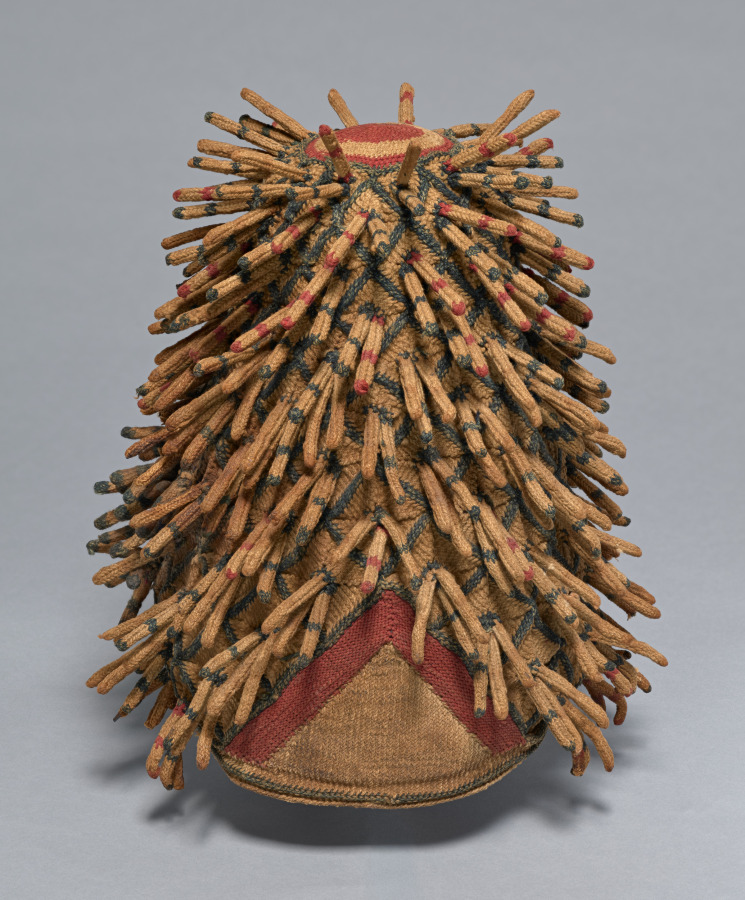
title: Prestige Headdress (Ashetu or shüötu)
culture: Bamum style, unknown maker, Grassfields region, Cameroon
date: 1900–1950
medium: cotton, dye (including indigo)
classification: Textile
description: The bristle-like surface of this man’s prestige headdress is dyed with indigo or a red pigment. Below, a diamond pattern evokes another royal symbol, the leopard. The projections are reinforced with small pieces of wood. Such extensions are seen on prestige headgear represented in wood in sculptures and in colored pencil on drawings in the collection.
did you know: Titled men still wear such prestigious adornment today.